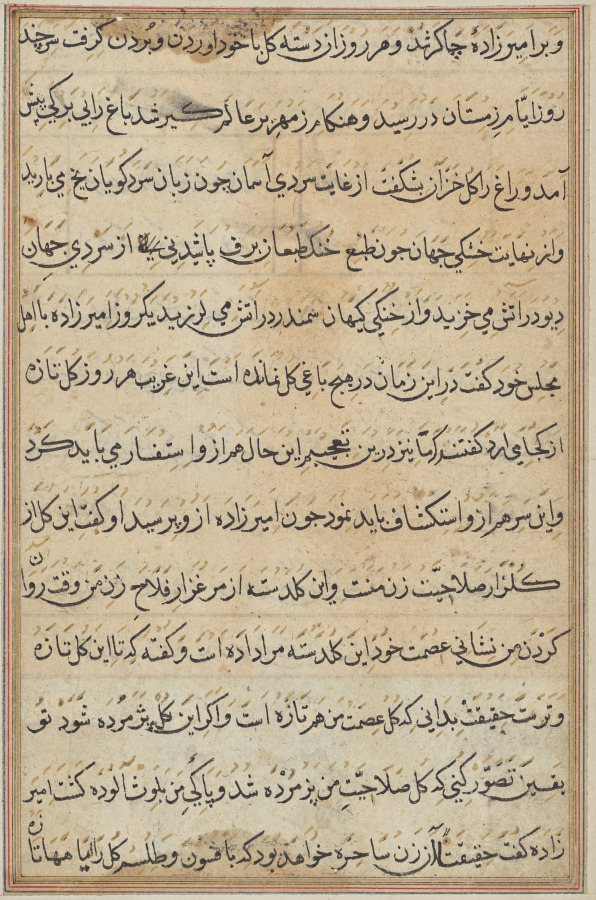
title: Page from Tales of a Parrot (Tuti-nama): text page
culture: Mughal India, court of Akbar (reigned 1556–1605)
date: c. 1560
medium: gum tempera, ink, and gold on paper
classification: Painting